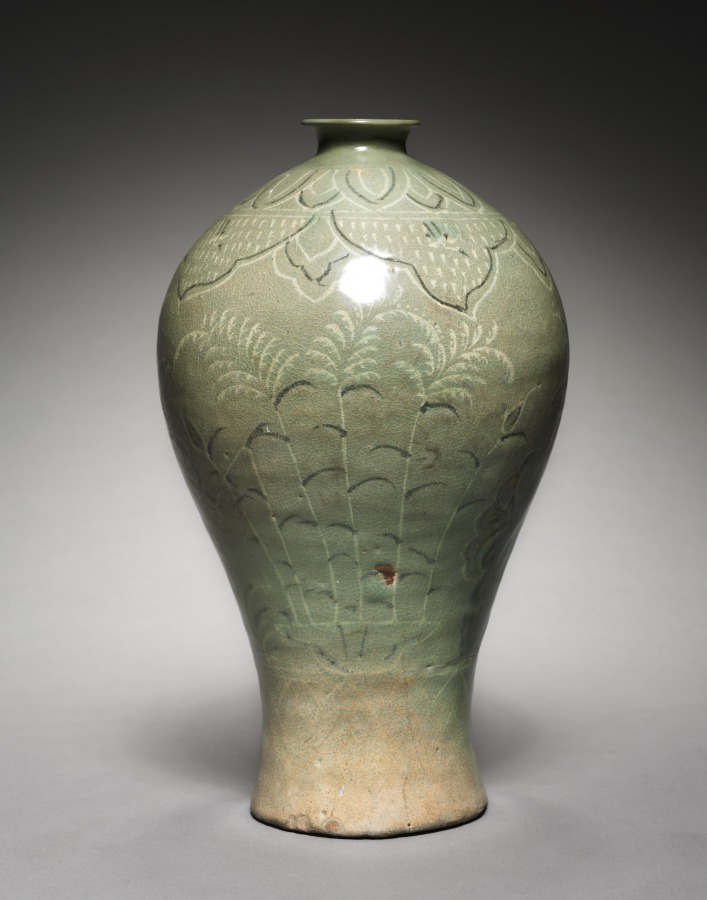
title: Prunus Vase with Inlaid Lotus and Reed Design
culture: Korea, Goryeo dynasty (918–1392)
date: 1300s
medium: Celadon ware with inlaid white and black slip decoration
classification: Ceramic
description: As early as the seventh century, the practice of drinking tea and wine became an important part of elite culture in Korea. Once used to store alcoholic beverages, this type of vase features a wide body followed by a sharply rounded shoulder, a short neck and a small opening. Most of the remaining examples no longer have a lid, but originally it may have had a lid that not only covers the opening, but also served as a cup.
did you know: Prunus vases are often believed to contain a branch of plum blossoms, but recent research reveals that these lidded vases were also used to contain cooking liquid such as sesame oil.